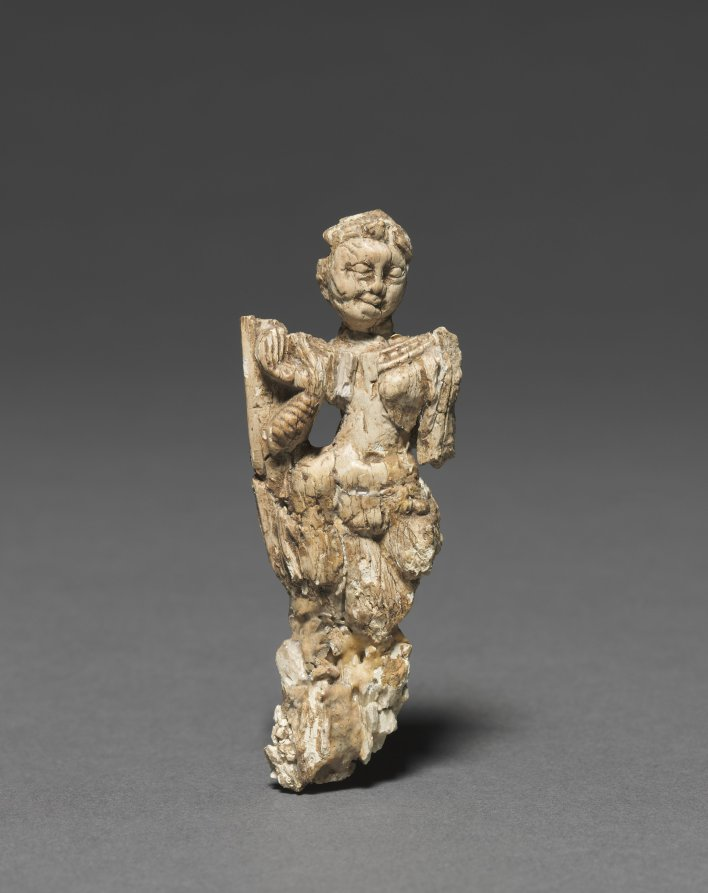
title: Standing Woman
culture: Afghanistan, Begram, Kushan period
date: c. 50–200 CE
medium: ivory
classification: Ivory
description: This ivory carving was made In India as a facing for wooden furniture, which disintegrated, leaving only the ivory veneers. Most of the imagery is life-affirming and auspicious, as seen in the image of a young woman. Indian ivory-faced furnishings--along with lacquer boxes from China and painted glass from Rome--were found in an extraordinary deposit of luxury goods at a site called Begram.